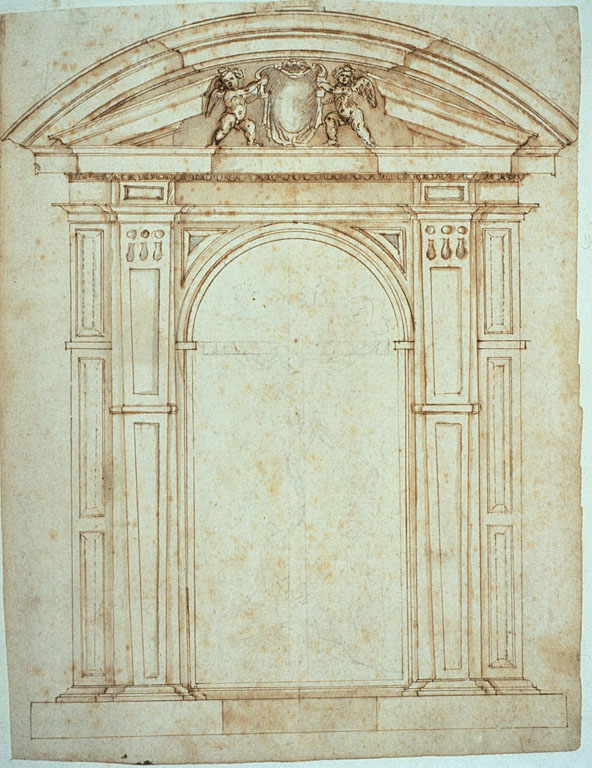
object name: Drawing and Watercolor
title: Doorway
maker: Circle of Andrea Palladio (Italian, 1508-1580)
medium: Pen and brown ink, brush and brown wash, with touches of gray and blue wash and traces of graphite, on ivory laid paper, laid down on cream laid paper, laid down in album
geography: Italy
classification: pen and ink drawings; drawings (visual works); prints and drawing